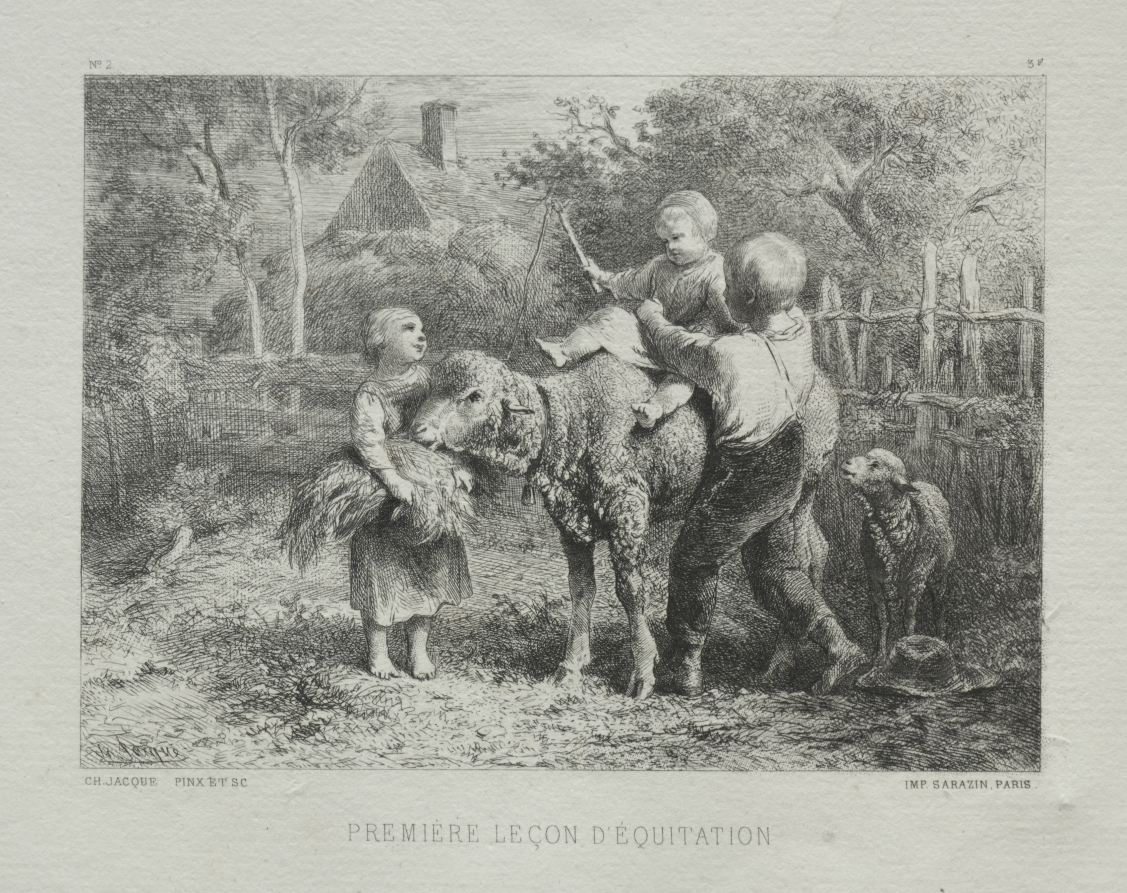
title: First Riding Lesson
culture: France, 19th century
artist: Charles-Émile Jacque (French, 1813–1894)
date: 1864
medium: etching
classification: Print